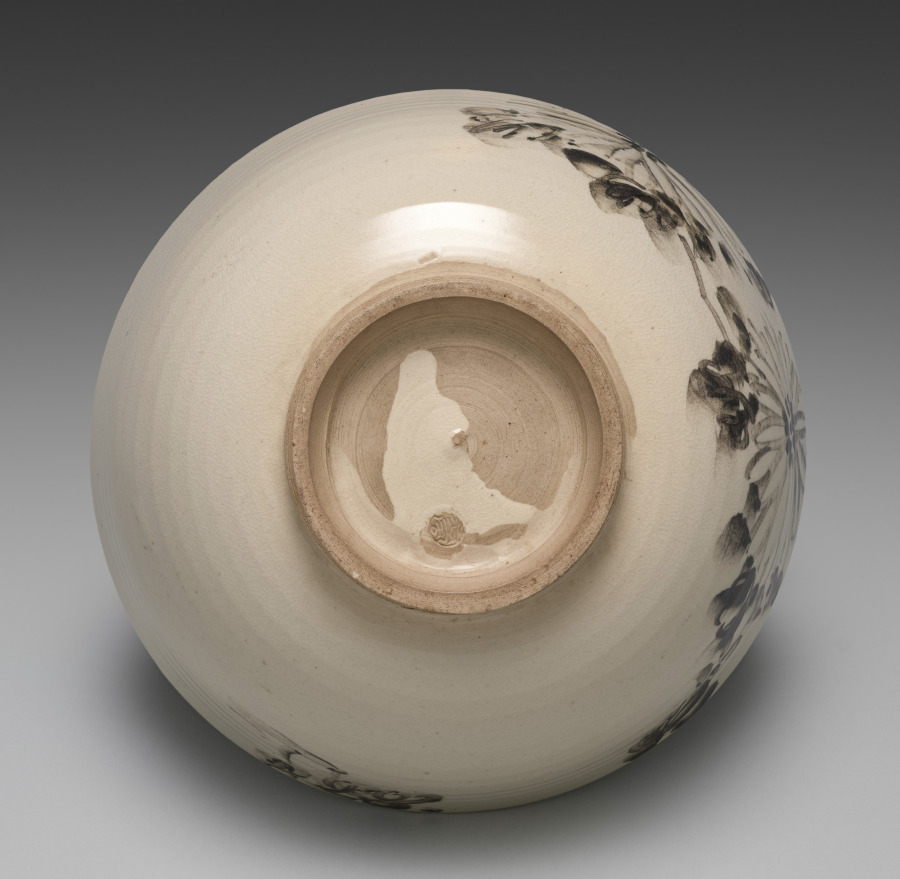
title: Bowl with Chrysanthemums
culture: Japan, Taishō period (1912–26) or Shōwa period (1926–89)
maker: Seifū Yohei IV (Japanese, 1872–1951)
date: 1914–46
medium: Stoneware with underglaze iron oxide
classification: Ceramic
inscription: 清風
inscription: 菊画/ 鉢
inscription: The inside of the box lid has a seal indicating that the bowl was included in a renewal opening of the gallery Manjudo in Tokyo.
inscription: 清風造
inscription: 成山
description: The chrysanthemums in underglaze iron oxide of this bowl of Kyoto ware have a casual feel, which is emphasized by the bowl's shape. When held, the its slightly ridged body would gently massage one’s palms, contributing to the sensory, tactile experience of the piece and possibly generating a sense of comfort and ease. The inside of the box lid has a seal indicating that the bowl was included in a renewal opening of the gallery Manjudo in Tokyo.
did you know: Stoneware works of this type are classified as Kyoto ware, after the city where the style developed.